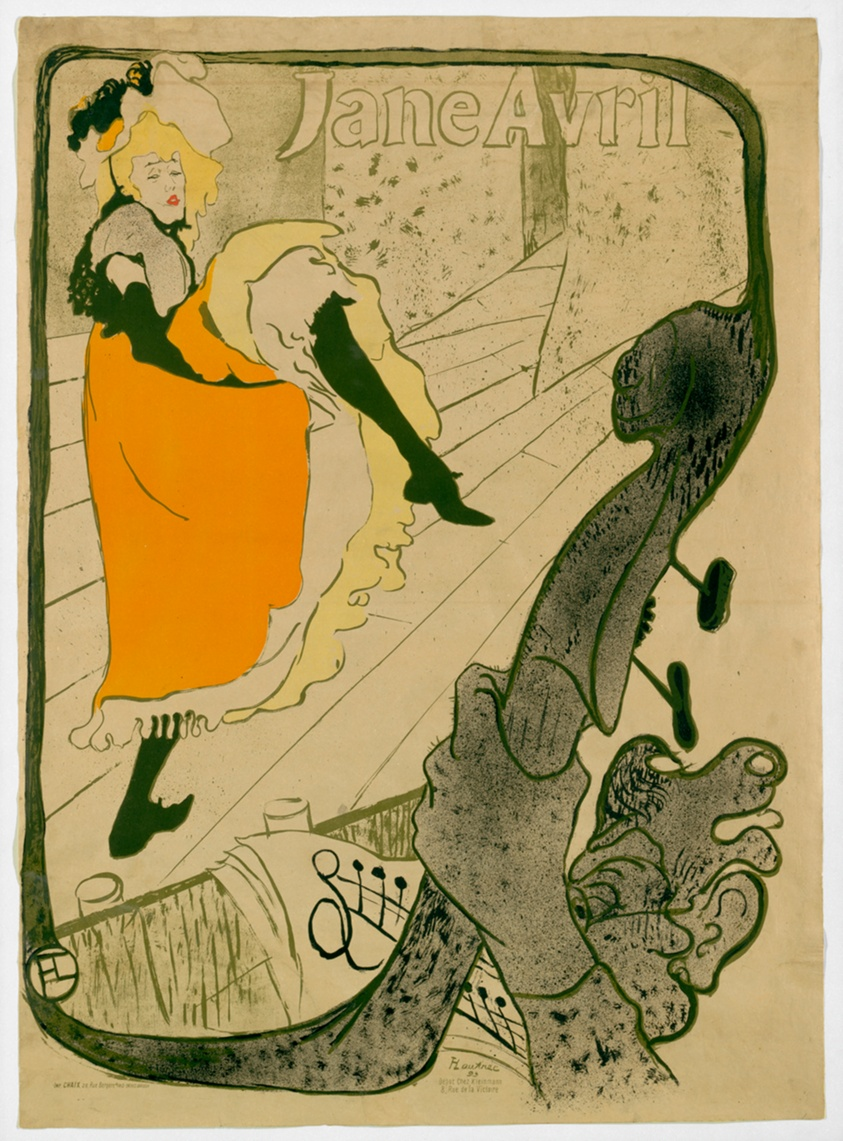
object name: Print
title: Jane Avril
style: Post-Impressionism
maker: Henri de Toulouse-Lautrec (French, 1864-1901)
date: 1893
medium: Color lithograph on tan wove paper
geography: France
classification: lithograph; print; prints and drawing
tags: women, dancers, music